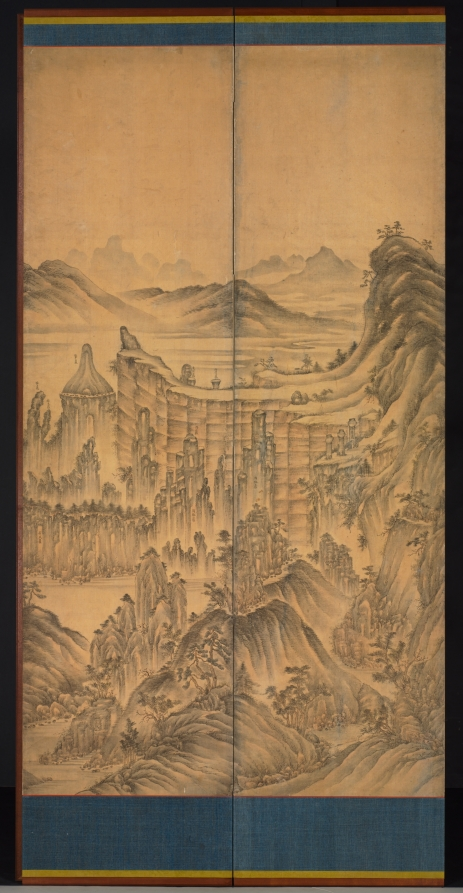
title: Seven Jeweled Mountain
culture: Korea, Joseon dynasty (1392–1910)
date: late 1800s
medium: ten-panel screen; ink and color on silk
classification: Painting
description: With a bird’s-eye view, this ten-panel folding screen portrays the famous Seven Jeweled Mountain 칠보산 in North Korea. Ancient volcanic eruptions shaped the mountain’s unique and awe-inspiring terrain such as phallic-shaped pillars (panel #5, from the right); a large flat-topped, steep-sided cliff (panels #7 and #8), and a rugged mountain composed of metamorphic and igneous rocks (panels #9 and #10). The tradition of landscape painting that details actual natural sites and captures their topographic features in Korea began in the 1700s and continued onward. While such natural wonders were beloved as popular destinations for tourism and pilgrimage, after the Korean War (1950–53), these sites in North Korea are no longer accessible to the outside world. This folding screen detailing the mountain’s distinctive topography feeds our imagination and longing for such an unattainable place.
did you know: Featuring a spectacular panoramic view and topographical details, this ten-panel folding screen is an excellent 19th-century version of the Korean “true-view” landscape painting tradition.